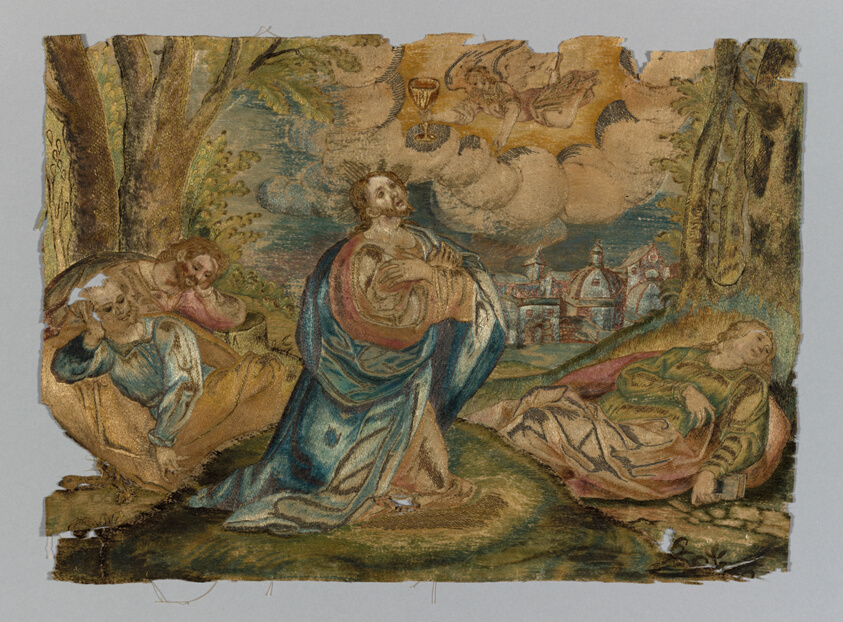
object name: Textile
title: Christ in the Garden of Olives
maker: Italy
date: 1775/1825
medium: Silk, satin weave; embroidered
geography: Italy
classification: textile; needlework (visual works)